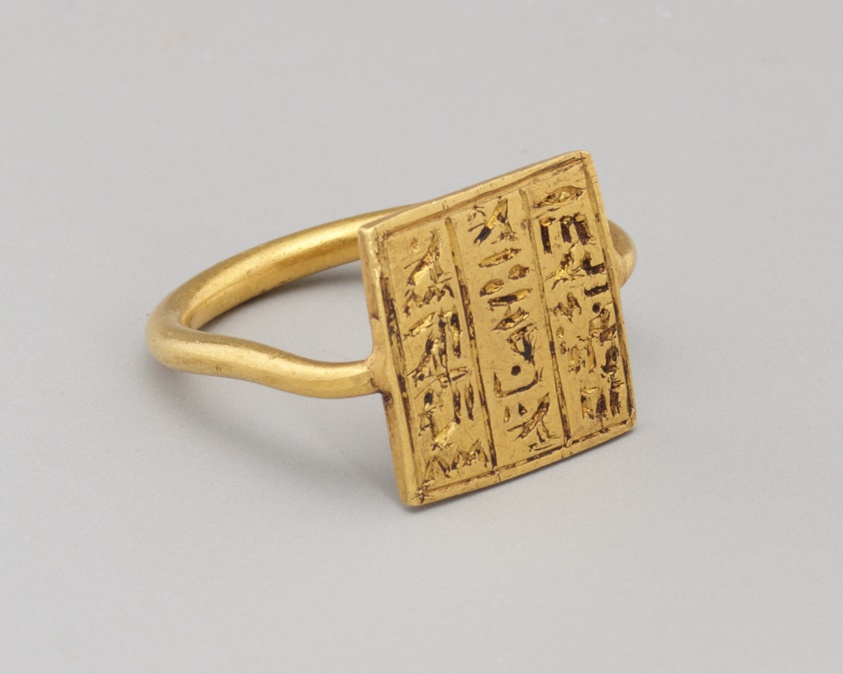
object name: Costume and Accessories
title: Ring Inscribed with Hieroglyphs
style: ptolemaic, egyptian, ancient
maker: Egyptian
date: Probably Ptolemaic Period (332–30 BCE)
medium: Gold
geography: Egypt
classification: ring (jewelry); gold; metal; jewelry; ancient art; costume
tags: Hieroglyphs, beauty, rituals